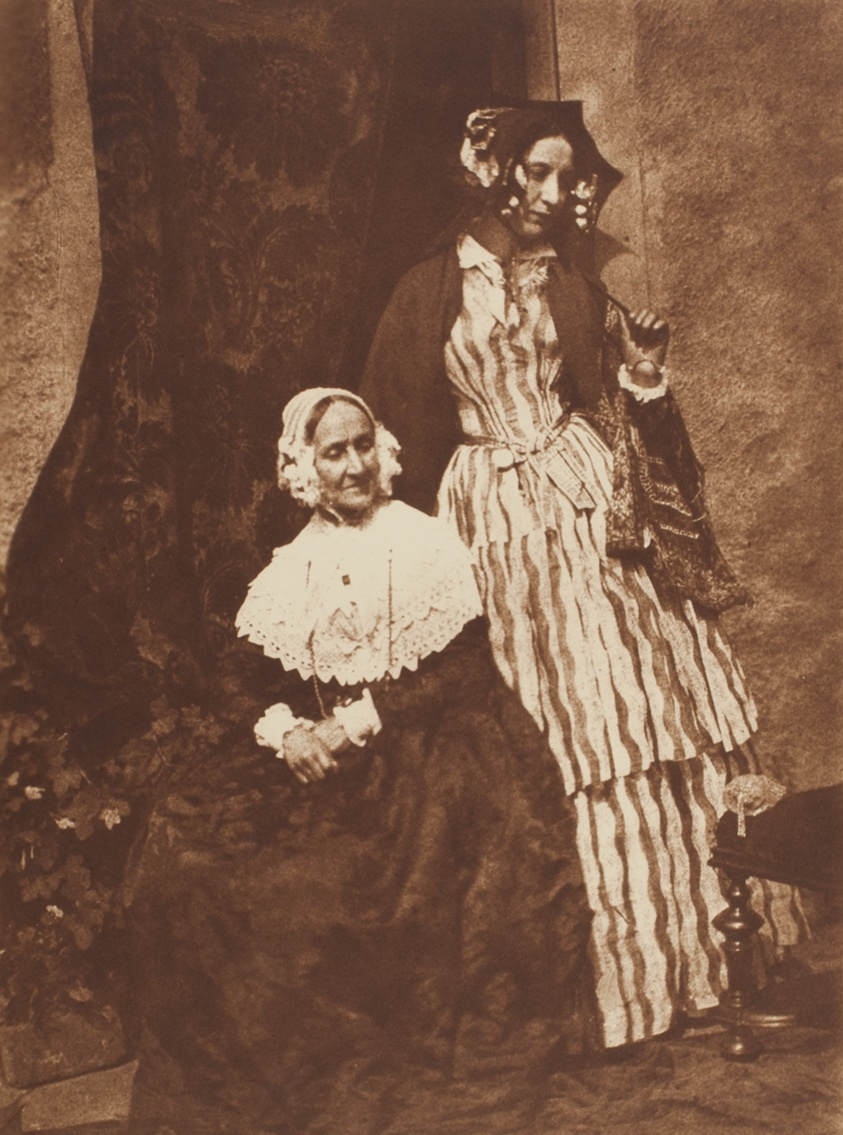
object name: Photograph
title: Mrs. Anne Rigby and Lady Elizabeth Eastlake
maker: David Octavius Hill (Scottish, 1802–1870) and; Robert Adamson (Scottish, 1821–1848)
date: 1843/47, printed c. 1916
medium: Carbon print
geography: Scotland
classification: photograph; carbon print; photography